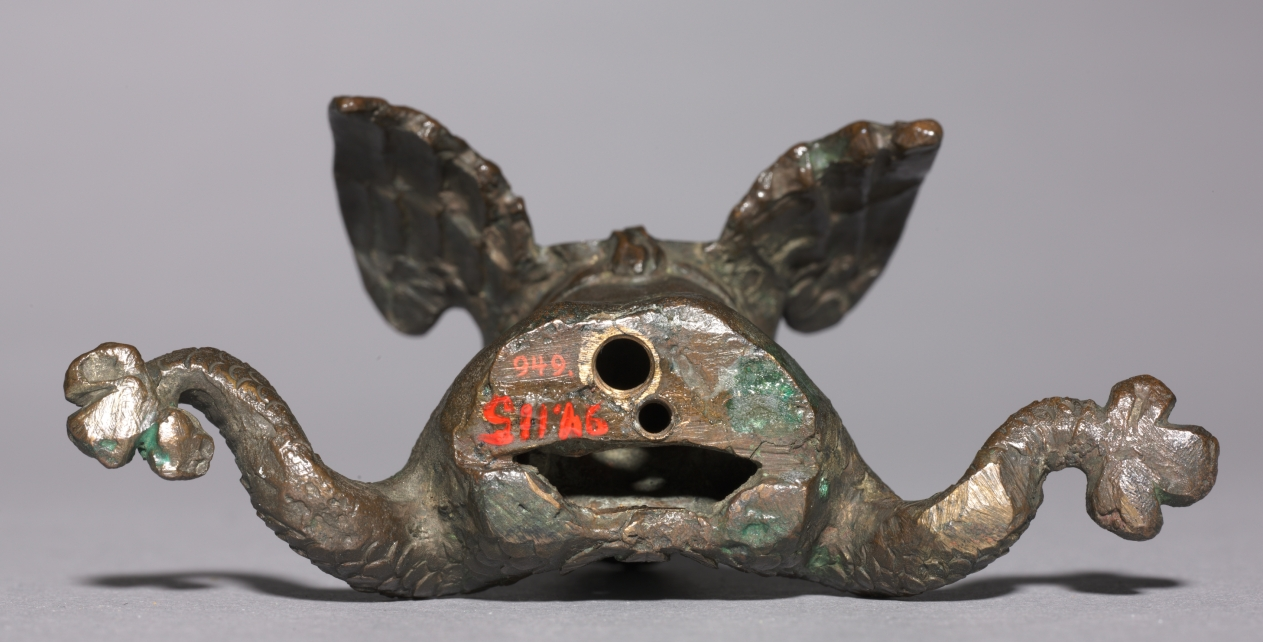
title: Doorpull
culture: Italy, 16th century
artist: Leone Leoni (Italian, 1509–1590)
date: 16th century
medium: bronze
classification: Sculpture